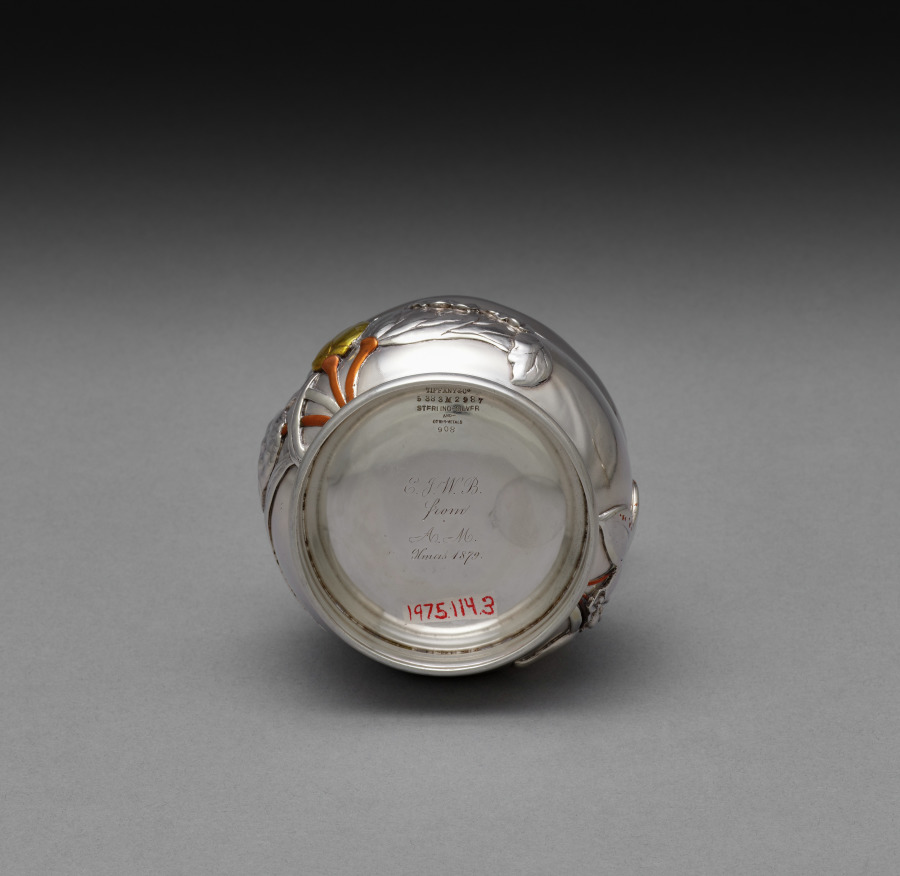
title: Sugar Bowl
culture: America, New York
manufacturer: Tiffany & Co. (America, New York, est. 1837)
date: c. 1879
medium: silver inlaid with copper and gold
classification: Silver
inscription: engraved: E.J.W.B./from/A.M./Xmas 1879. (The A.M. may refer to Alfred Morrison, a wealthy man who supported contemporary decorative arts by collecting them for his London house.)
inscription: Stamped underside: "Tiffany + Co.\ 5401 M 2987\ Sterling-silver\ and-\ other\- metals\ 909"